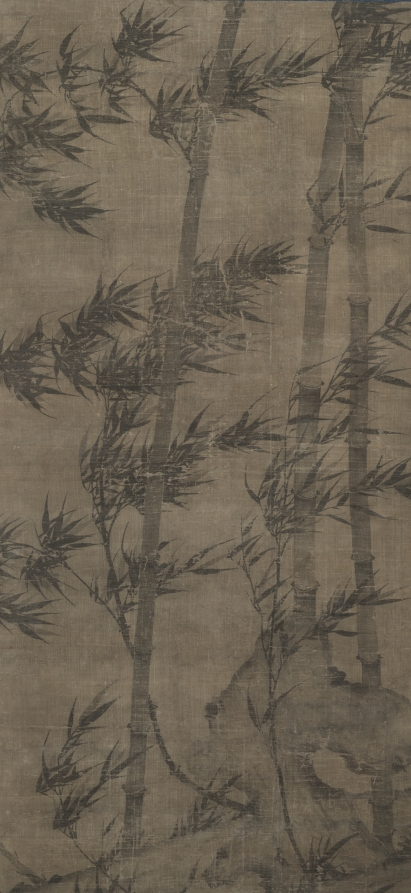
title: Bamboo in Four Seasons: Summer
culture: China, Yuan dynasty (1271-1368)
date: 1279–1368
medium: hanging scroll; ink on silk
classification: Painting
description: The painting depicts high bamboo stems in a breeze with leaves all torn in one direction. The rock on the right suggests a garden setting. Bamboo remains green throughout the year; new shoots emerge every spring and are a Chinese delicacy. During the Yuan dynasty, monochrome ink painting became the dominant style of the scholar-artist, and is used here by a professional painter. Monochrome bamboo with leaves blown in the wind was a popular subject as its depiction demanded brushstrokes and techniques similar to writing calligraphy.